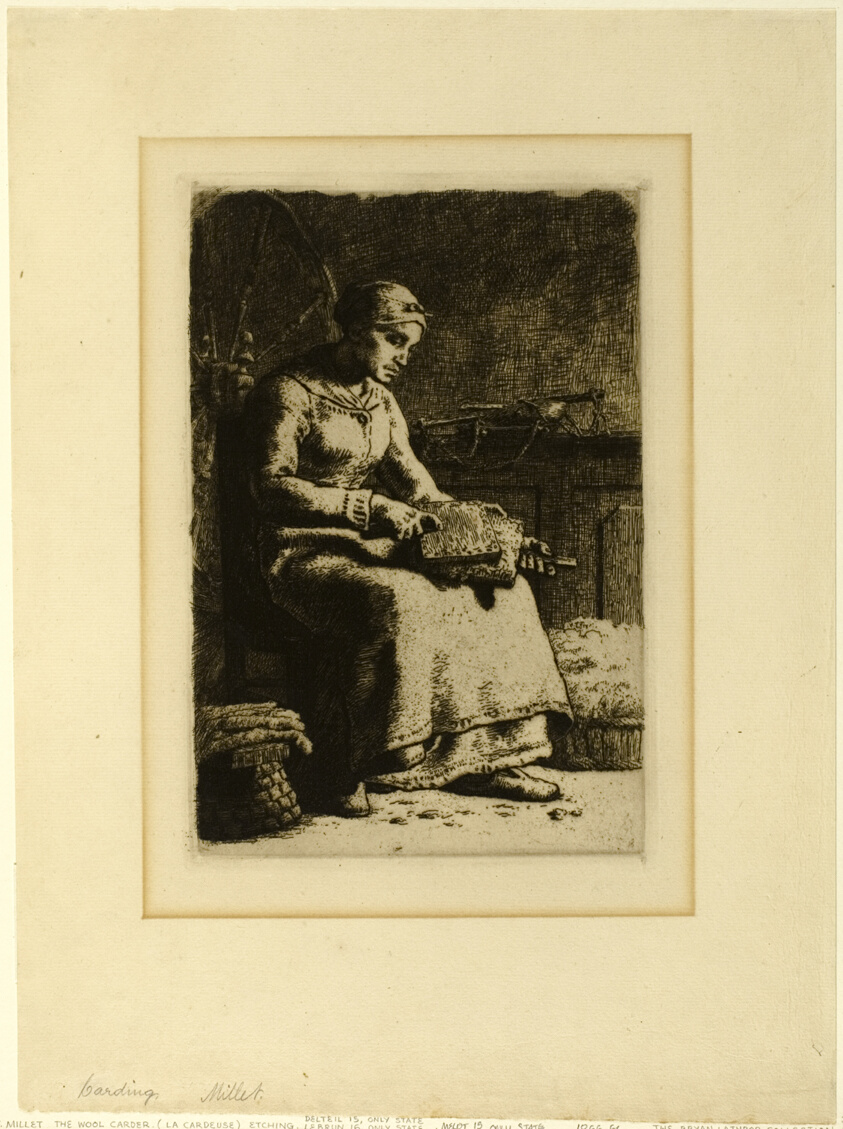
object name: Print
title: The Wool-Carder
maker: Jean François Millet (French, 1814-1875)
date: 1855–56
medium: Etching on cream laid paper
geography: France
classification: etching; print; prints and drawing